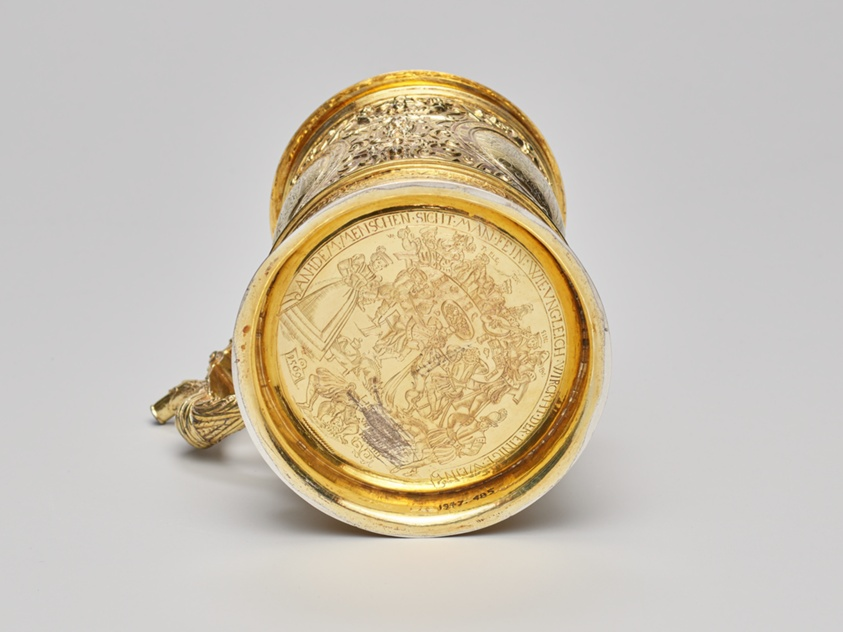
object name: Decorative Arts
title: Tankard with Biblical Scenes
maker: German, Passau or Ingolstadt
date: 1569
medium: Silver gilt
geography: Passau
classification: silver; metalwork; european decorative arts; decorative arts